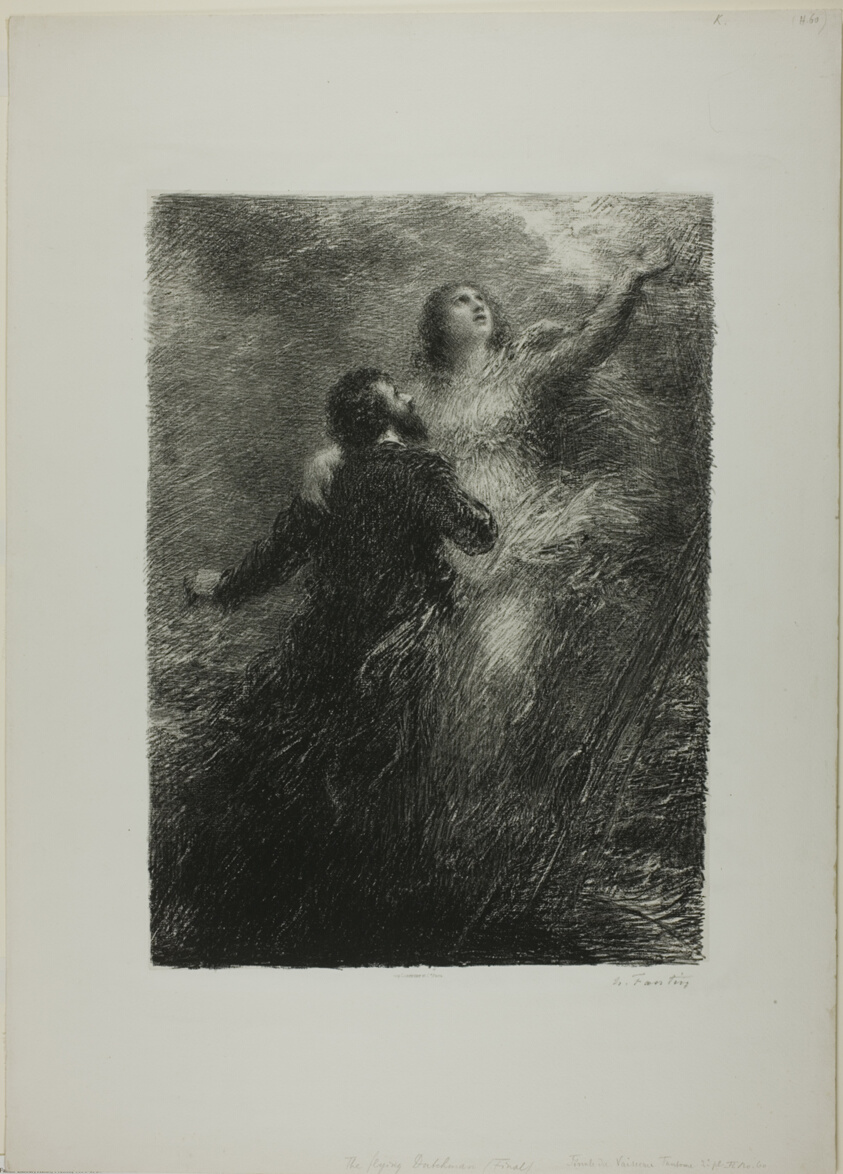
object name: Print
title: Finale of the Flying Dutchman, second plate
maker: Henri Fantin-Latour (French, 1836-1904)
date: 1885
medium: Lithograph in black on off-white China paper laid down on off-white wove paper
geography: France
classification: lithograph; print; prints and drawing